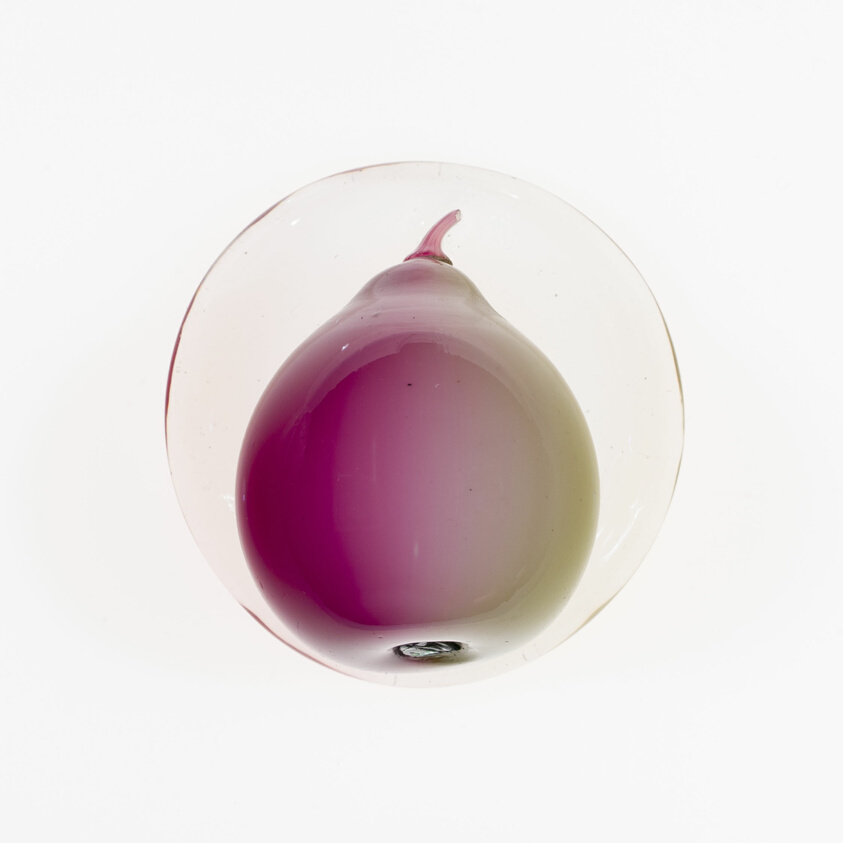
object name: Glass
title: Paperweight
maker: New England Glass Company (Cambridge, Massachusetts, 1818-1888)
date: Late 19th century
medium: Glass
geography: United States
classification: paperweight; fauna/flora/fruit; european decorative arts; glass